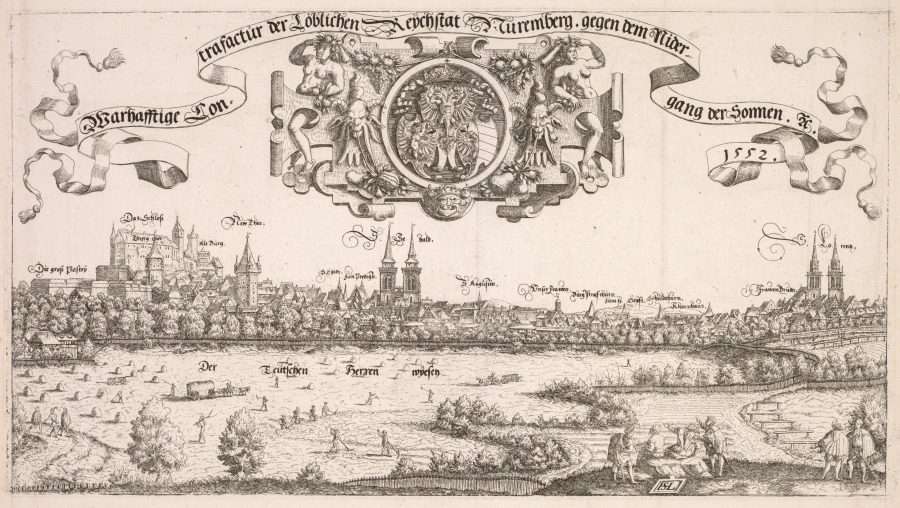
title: Panoramic View of Nuremberg: Center Portion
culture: Germany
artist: Hanns Lautensack (German, 1524–1566)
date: 1552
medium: etching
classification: Print